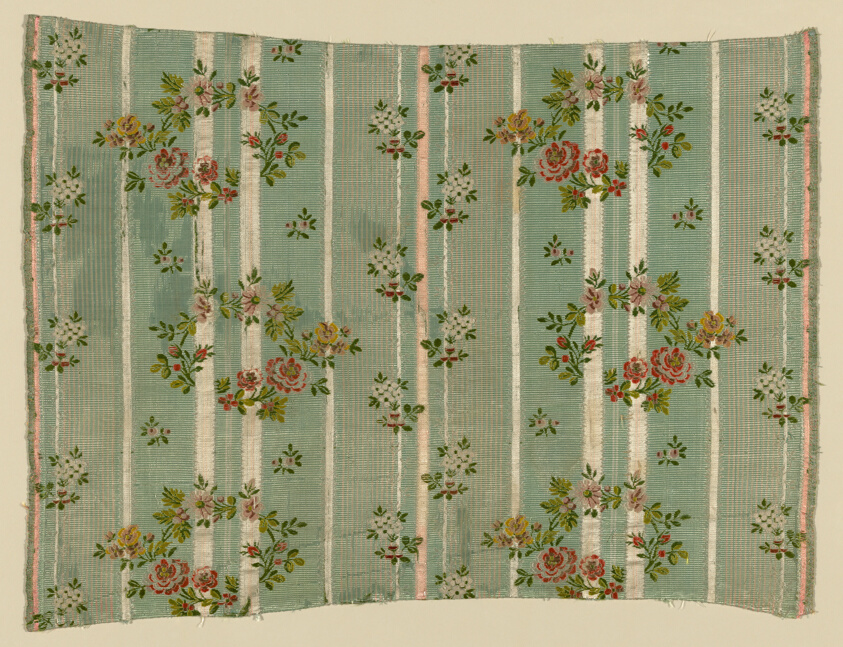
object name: Textile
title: Panel (Dress Fabric)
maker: France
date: 1775/1800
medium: Silk, stripes of warp-float faced satin weave and stripes of two-clor complementary weft plain weave with supplementary patterning warps and self-patterned by ground weft floats; both with supplementary brocading wefts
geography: France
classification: textile; weaving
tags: fashion